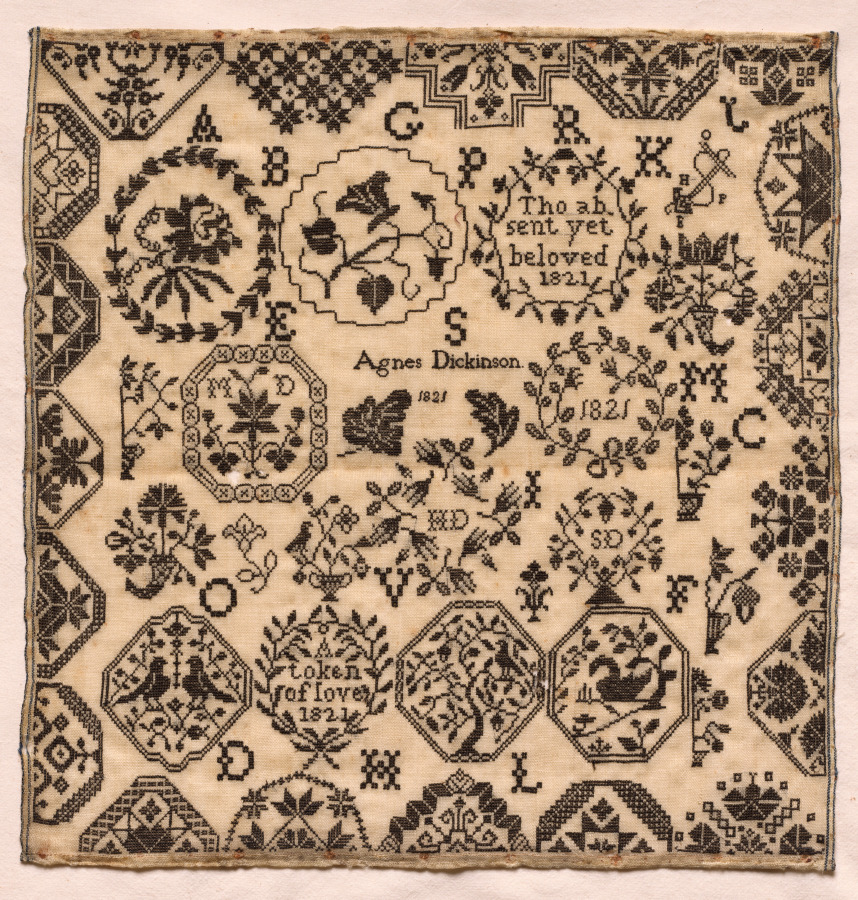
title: Sampler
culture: England, early 19th century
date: 1821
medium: embroidery; silk on woolen canvas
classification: Sampler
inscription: scattered letters of the alphabet; wreathed mottoes, upper right-hand side: "Tho ab-/ sent yet/ beloved/ 1821"; lower left-hand side: "A/ token/ of love/ 1821"; signed in center: "Agnes Dickinson/ 1821"; initials within wreaths, from left to right: "MD"; "HD"; "SD."